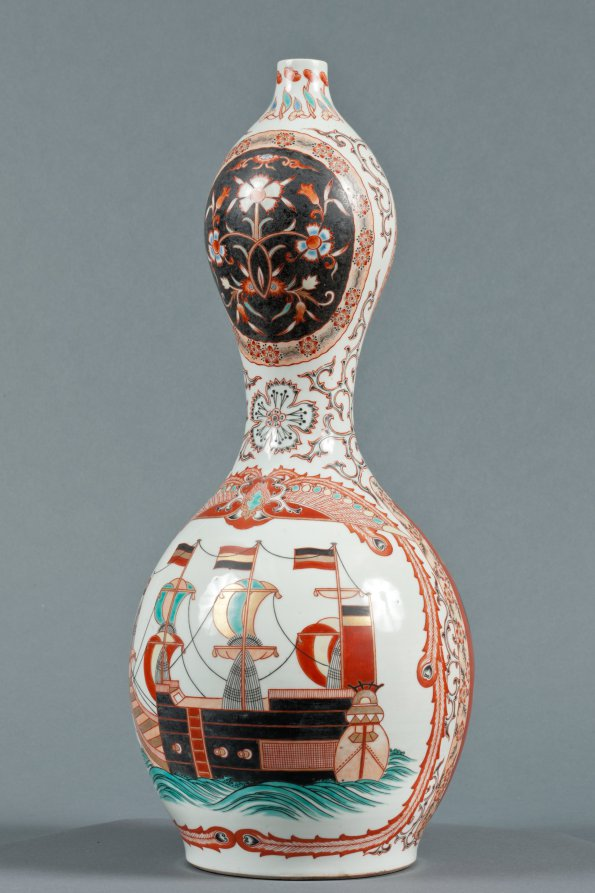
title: Bottle with Western Ships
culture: Japan, Edo period (1615–1868)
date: c. 1800–1868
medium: Porcelain with decoration in colored enamels and underglaze blue, overglaze enamels, and gold (Hizen ware, Arita type)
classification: Ceramic